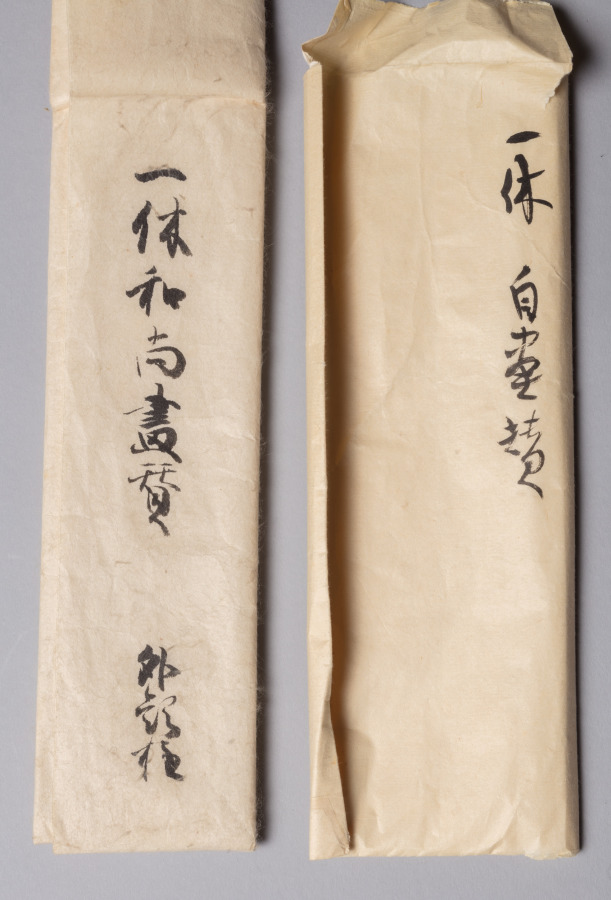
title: Calligraphy with Willow and Swallows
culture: Japan, Muromachi period (1392–1573)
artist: Ikkyū Sōjun (Japanese, 1394–1481)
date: 1400s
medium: hanging scroll, ink on paper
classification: Painting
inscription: How many days has it rid itself of the crow’s cloth? It knows not!/ Lovely is its body so nimble and neat./ Neither men of wealth, courtly position, or power can come close to the unfettered, noble swallow!/ With the coming of spring, it seems to be flying about, dancing around the grass hut of the foolish Priest. signed: Unkasō Isshi Tōkai jun Ikkyū shi ga ippitsu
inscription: outer box inscribed: Ikkyū Ōshō Enshi-zu Jigasan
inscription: inner box side lid inscribed: Showa 50 (1975), November by Tayama Honan with kao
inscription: Inner box side lid inscribed: Ikkyū Ōshō Bokuseki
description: The famed Buddhist monk Ikkyū is best remembered for his calligraphy. Calligraphic conventions of his time called for brushwork that did not vary much in style from character to character. However, as Ikkyū’s lines progress, his brushwork wanders between standard script and a sort of shorthand, marked by an uneven distribution of ink and a reduction of the characters to only the most necessary strokes. Ikkyū’s direct communication of emotion via brushwork became characteristic of the works produced by monks affiliated with the temple Daitokuji later in the Edo period (1615–1868).